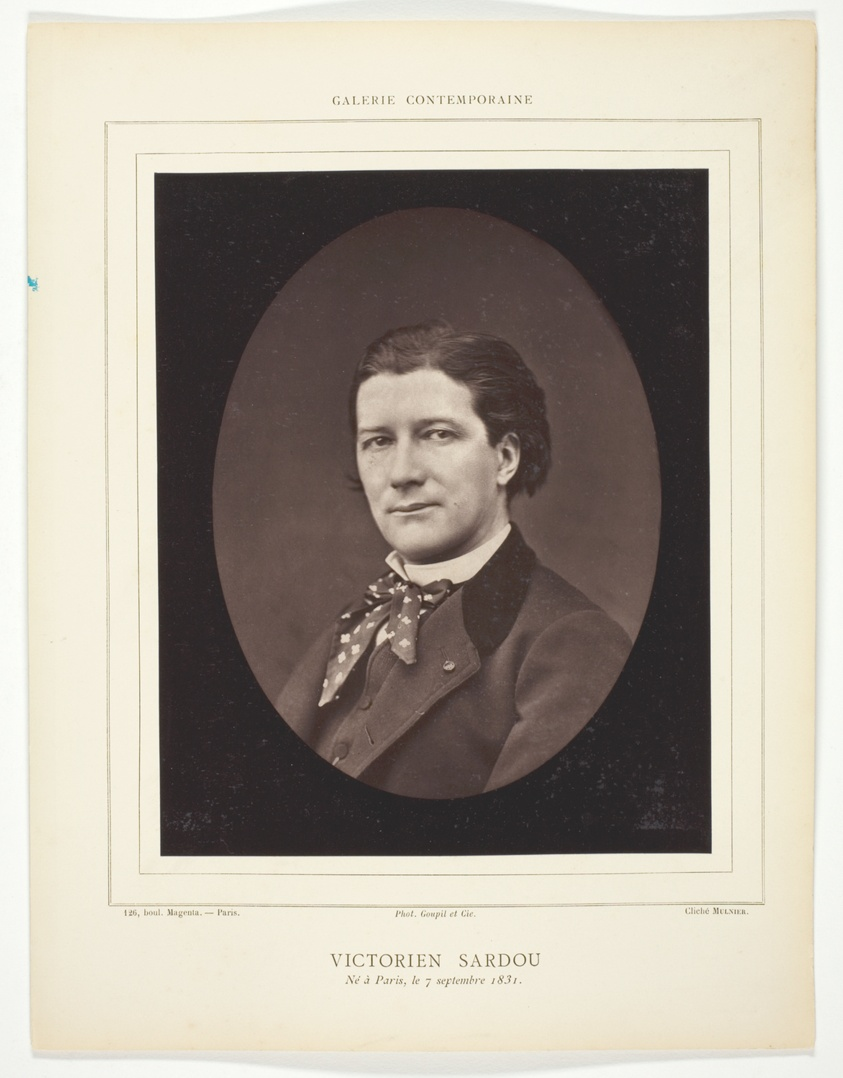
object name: Photograph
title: Victorien Sardou (French playwright, 1831-1908)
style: 19th century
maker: Ferdinand J. Mulnier (French, born 1825, active 1860–1890)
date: c. 1876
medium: Woodburytype, from the periodical “Galerie Contemporaine Littéraire, Artistique” (1879), volume 8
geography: France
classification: woodburytype; photomechanical process; photography; photograph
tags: Collected by Hugh Edwards, Paris, Contemporaine Littéraire